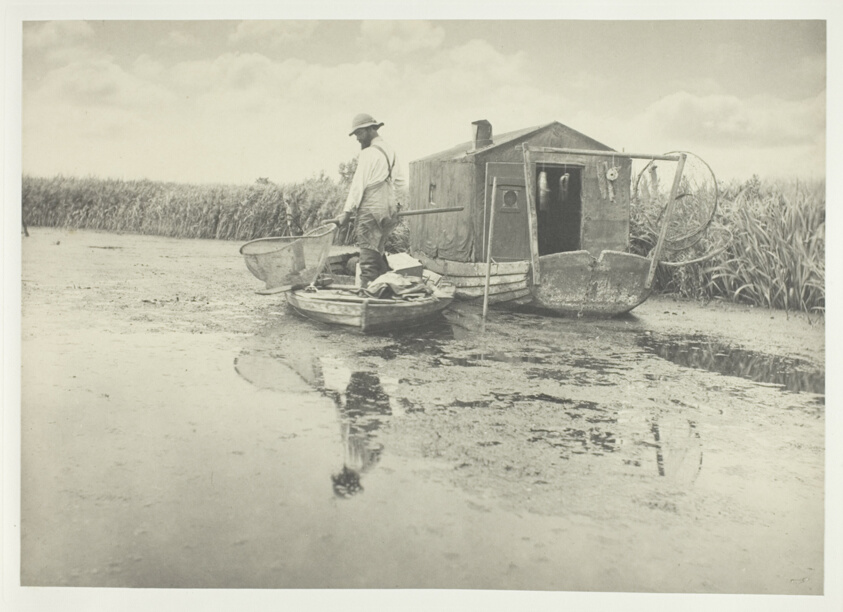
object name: Photograph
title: An Eel-Catcher's Home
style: 19th century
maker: Peter Henry Emerson (English, born Cuba, 1856–1936)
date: 1886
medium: Platinum print, pl. VI from the album "Life and Landscape on the Norfolk Broads" (1886)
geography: England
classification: platinum print; photographic process; photography; photograph